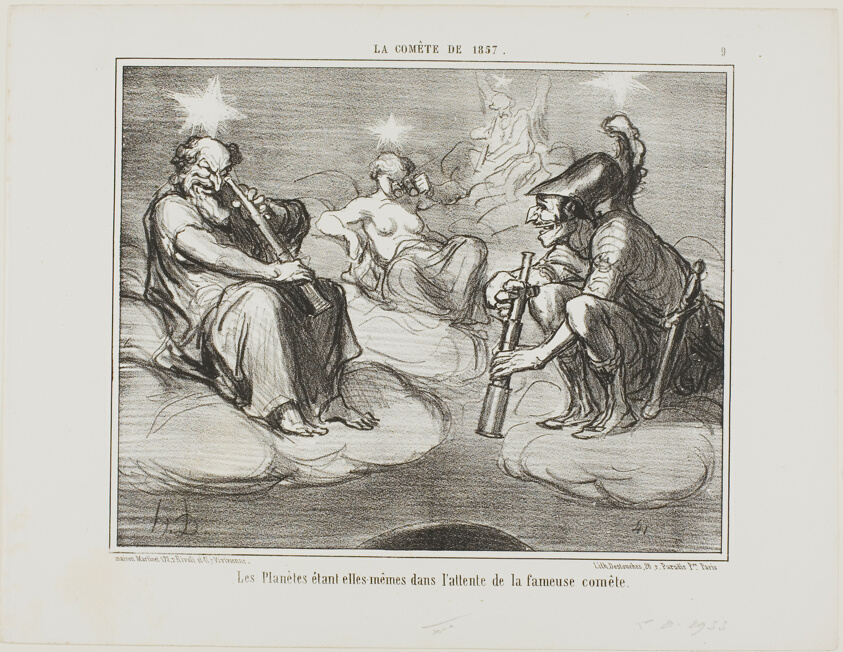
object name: Print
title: Even the Planets are Watching with Interest the Arrival of the Famous Comet, plate 9 from La Cométe De 1857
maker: Honoré Victorin Daumier; French, 1808-1879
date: 1857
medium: Lithograph in black on white wove paper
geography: France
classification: lithograph; print; prints and drawing